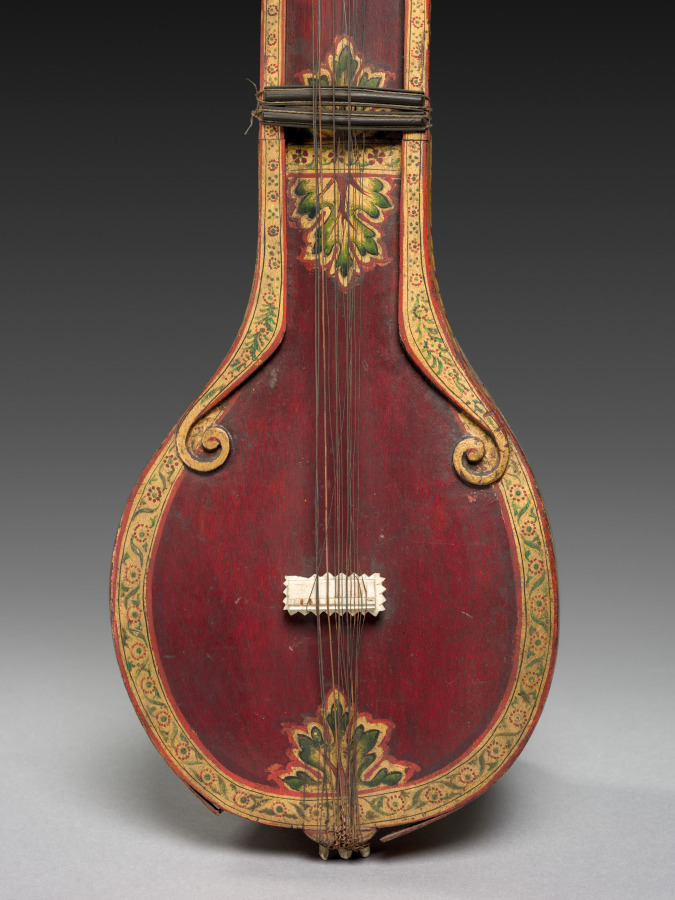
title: Sitar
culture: Eastern India, Bengal or Bangladesh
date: c. 1850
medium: Gourd and wood with pigment, ivory, and bone; copper alloy: frets; iron alloy: strings (with one modern copper replacement)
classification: Musical Instrument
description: The stringed instrument known as the sitar usually provided the central sound for the musical performances that were a constant feature of court life in India. The sitar could then be accompanied by percussion, voice, and other supporting instruments. In Raja Deen Dayal’s photograph Maharaja of Rewa in Prayer (2016.266.21), a musician strums a sitar in order to please the deities on the royal altar. The improvised compositions are played in a mode, or key, that correlates to the time of day and season of the year.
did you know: Many paintings of Indian court life depict female musicians holding and playing this kind of lightweight stringed instrument.